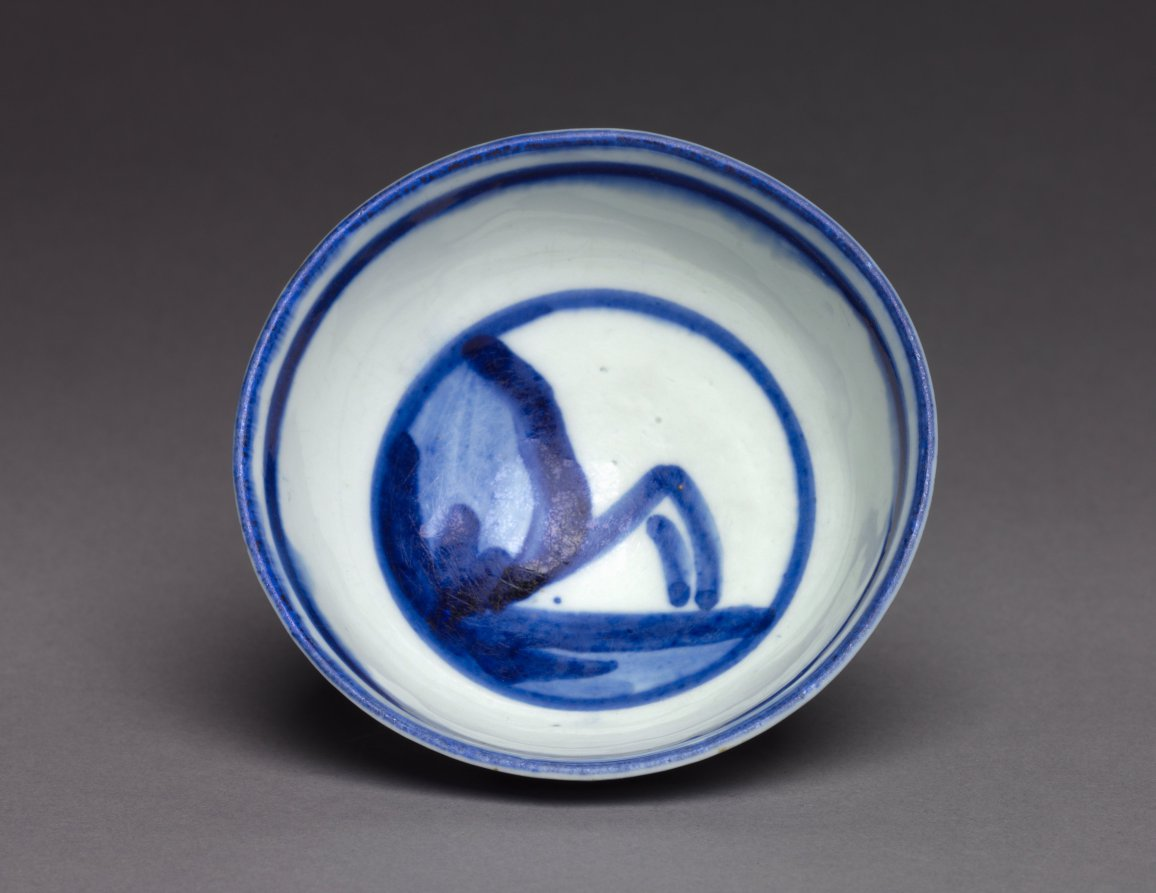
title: Tea Bowl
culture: France, Chantilly, late 18th-early 19th century(?)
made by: Chantilly Porcelain Factory (French)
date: 1800s ?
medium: porcelain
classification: Ceramic